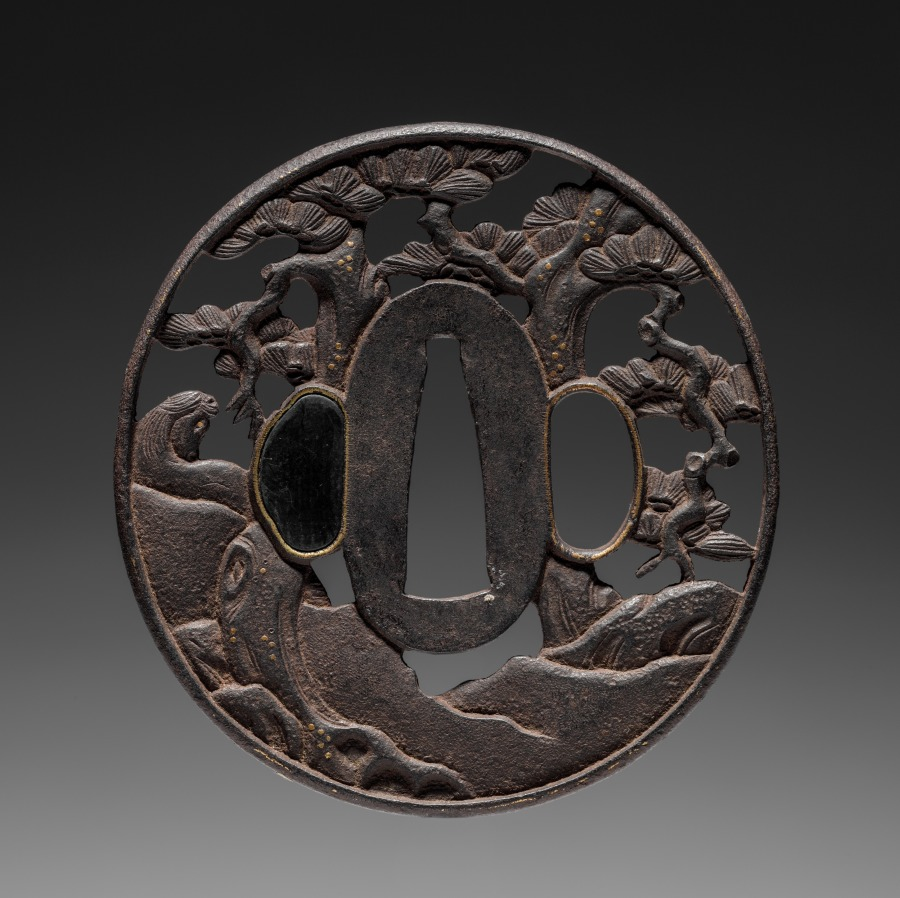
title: Sword Guard (Tsuba) with Horses under Pine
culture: Japan, possibly Edo period (1615-1868)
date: c. 1615–1868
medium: iron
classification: Arms and Armor